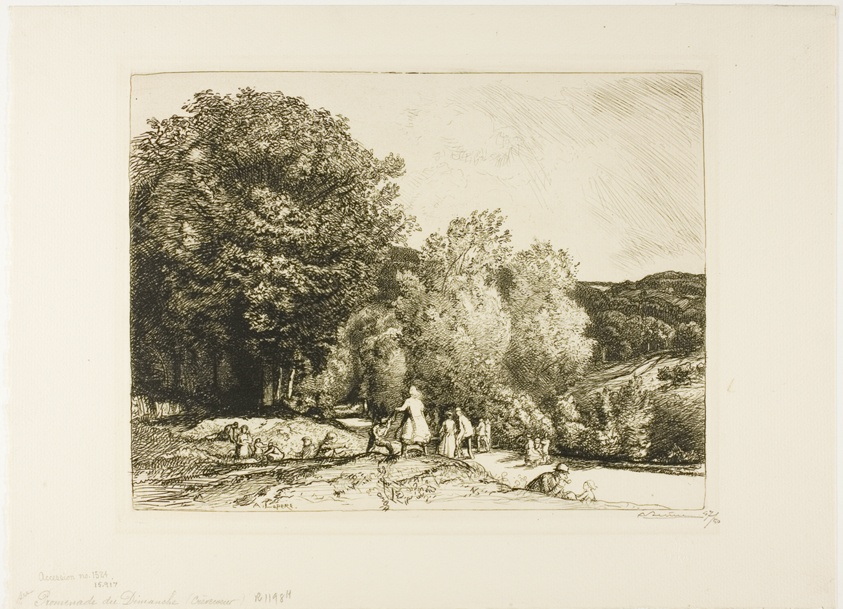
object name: Print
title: Sunday Walk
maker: Louis Auguste Lepère (French, 1849-1918)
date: 1913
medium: Etching on cream laid paper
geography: France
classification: etching; print; prints and drawing